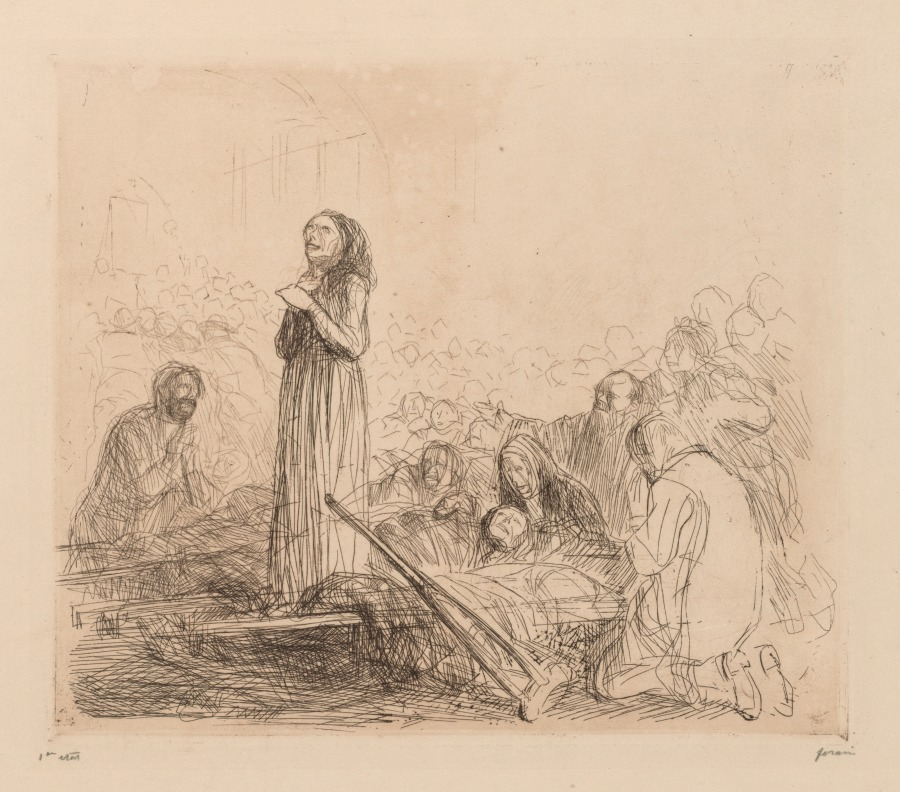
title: The Miracle at Lourdes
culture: France, 19th-20th century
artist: Jean Louis Forain (French, 1852–1931)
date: c. 1912–13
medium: lithograph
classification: Print